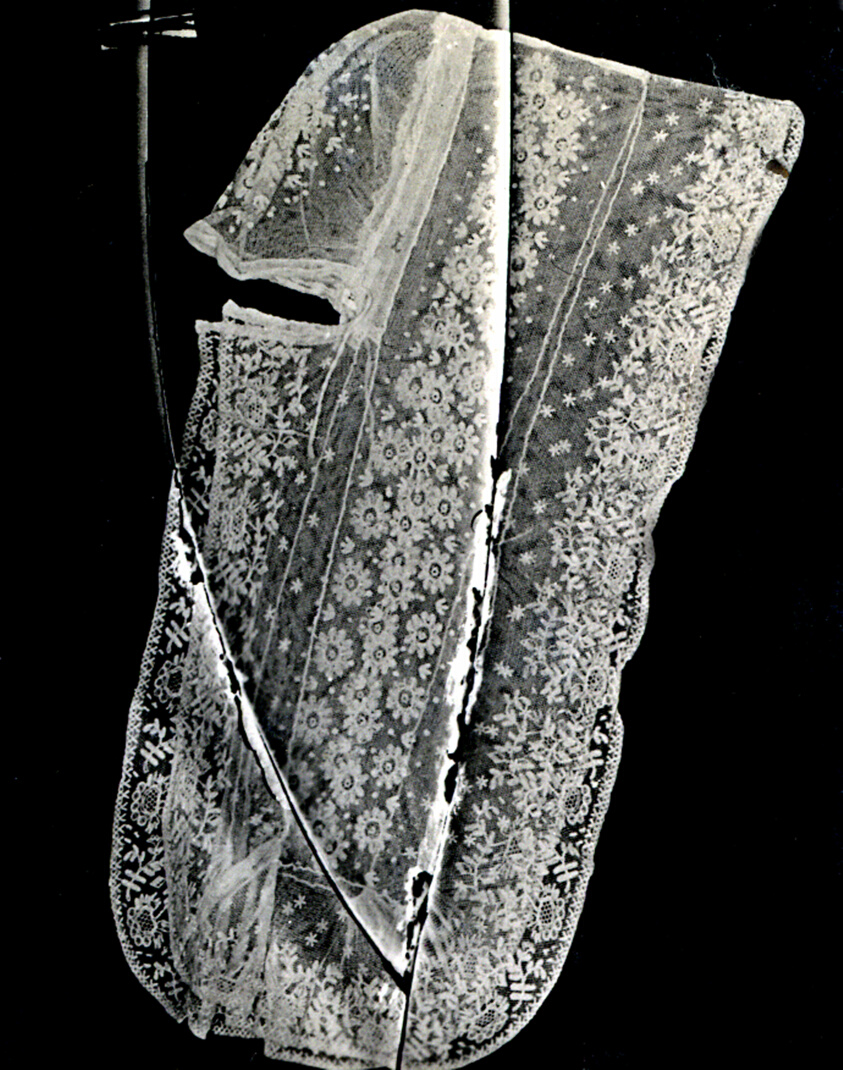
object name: Textile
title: Cap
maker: France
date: 1850/1900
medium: Cotton, machine-made twist net; embroidered with cotton and linen in chain stitches (tambour work), darning, Indian drawn ground filling, and wave filling stitches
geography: France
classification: textile; lace - mixed